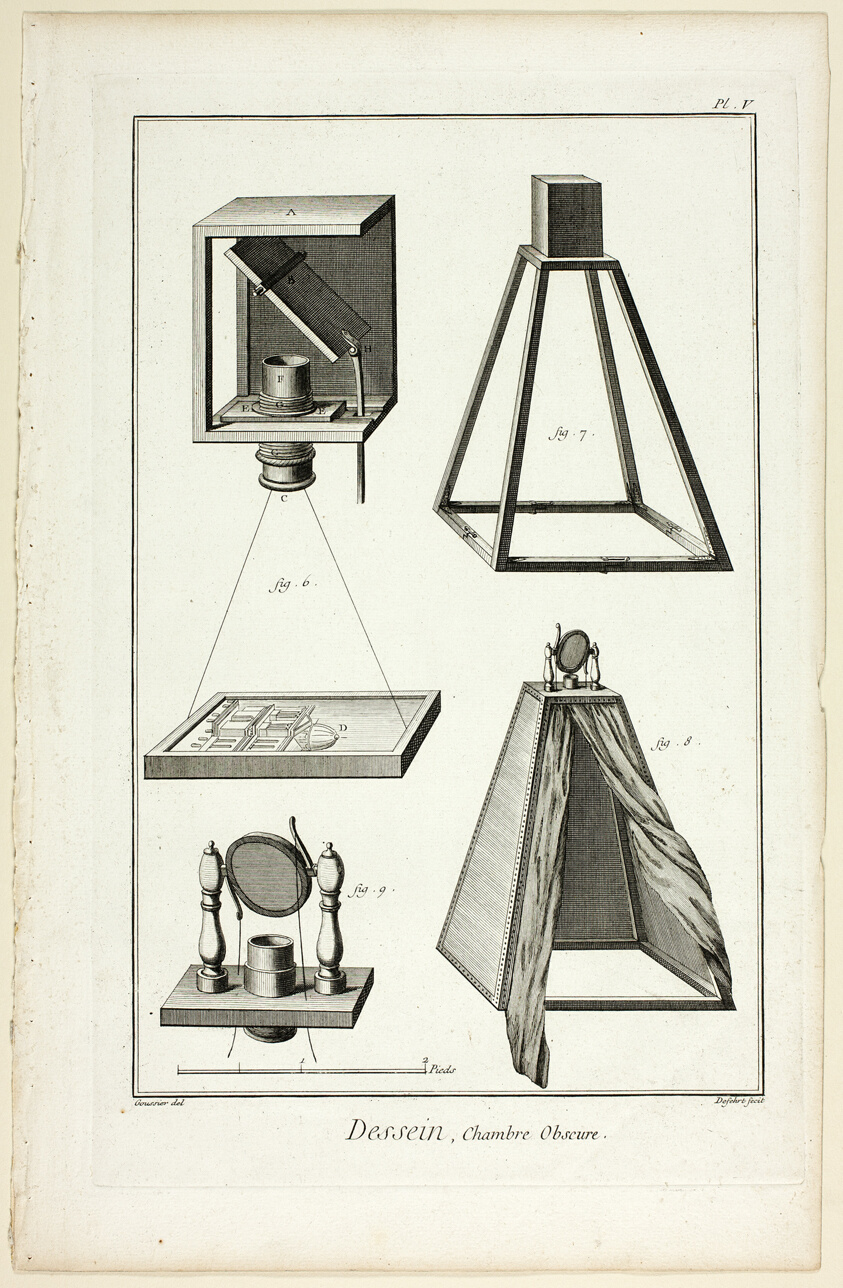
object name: Print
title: Design: Camera Obscura, from Encyclopédie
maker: A. J. Defehrt (French, active 18th century); after Louis-Jaques Goussier (French, 1722-1799); published by André le Breton (French, 1708-1779), Michel-Antoine David (French, c. 1707-1769), Laurent Durand (French, 1712-1763), and Antoine-Claude Briasson (French, 1700-1775)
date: 1762/77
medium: Engraving on cream laid paper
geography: France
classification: etching; print; prints and drawing